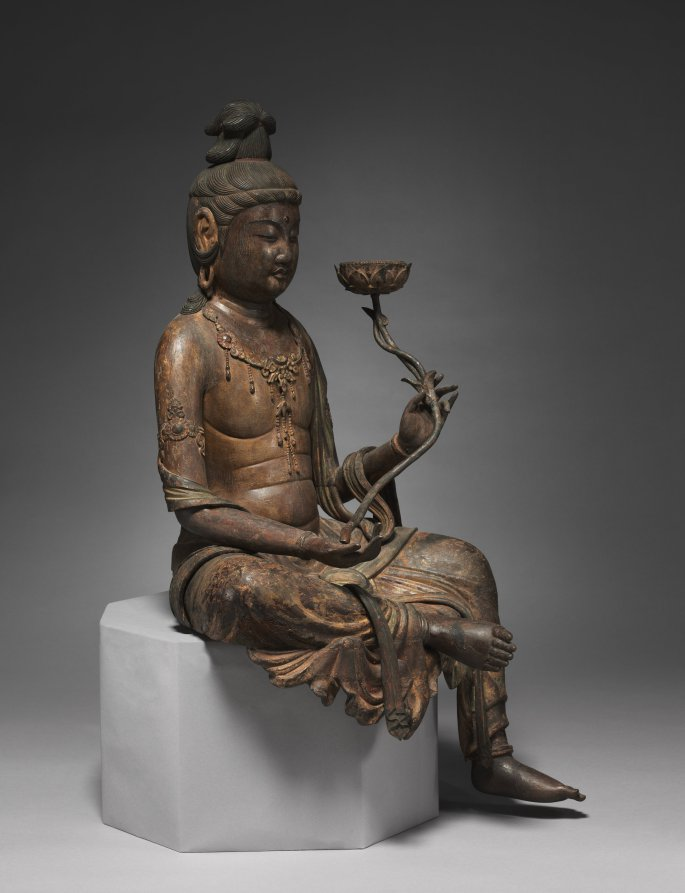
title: Bodhisattva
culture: Japan, Kamakura period (1185–1333)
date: mid-1200s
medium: wood with traces of lacquer, polychromy, and cut gold lear (kirikane)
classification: Sculpture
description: A Bosatsu (Bodhisattva in Sanskrit) is a being that has attained enlightenment but has compassionately refrained from entering nirvana in order to save others. As an attendant of Buddha, Bosatsu assumes many forms, all of which are worshipped as deities in Japanese Buddhism.